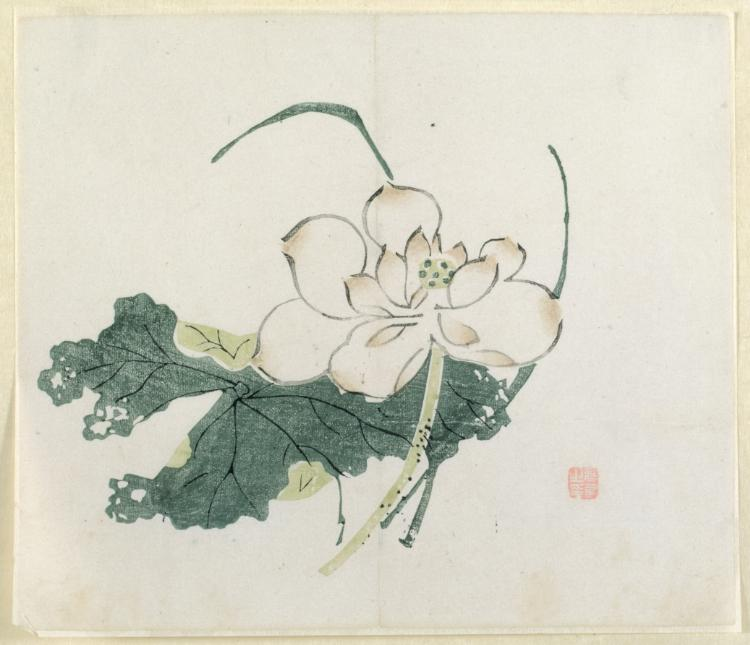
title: Lotus Blossom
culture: China, Ming dynasty (1368-1644) or later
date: 1368–1644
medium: color woodblock print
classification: Print